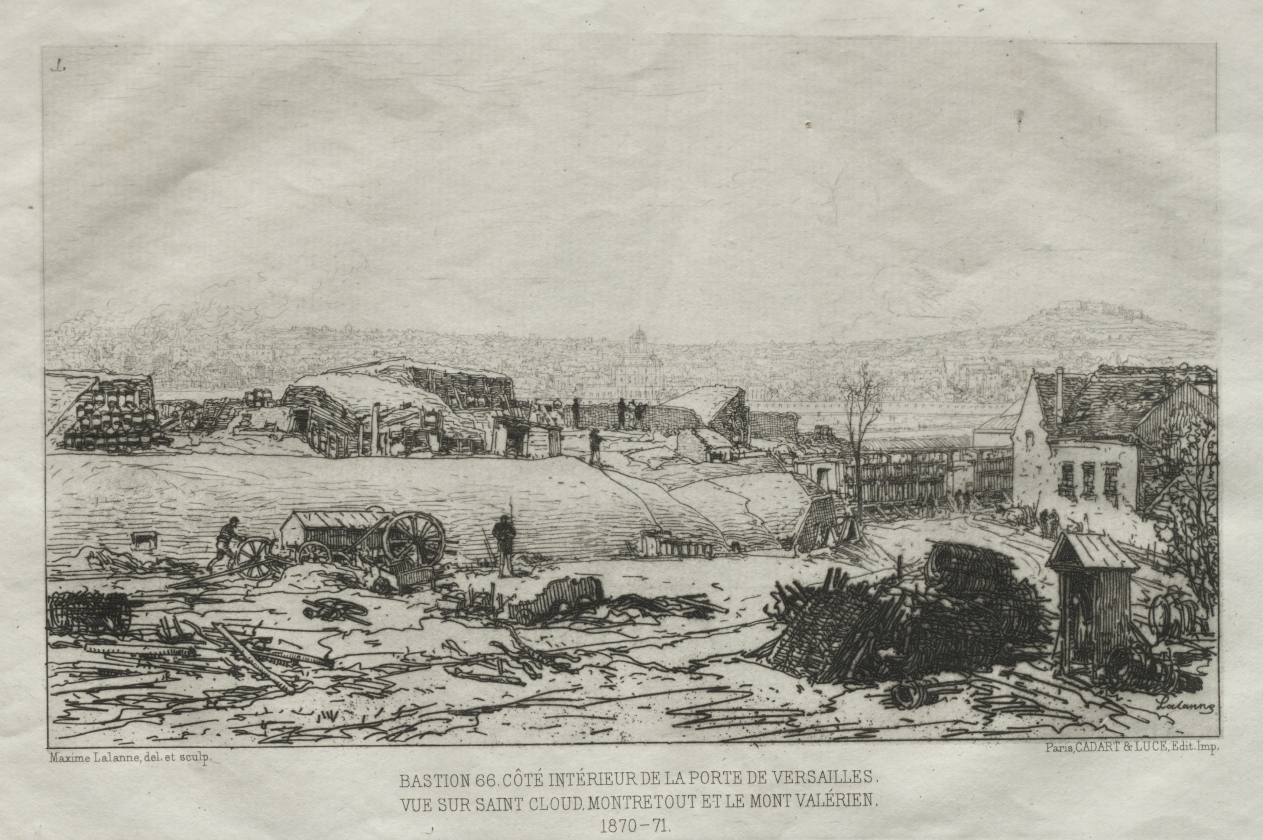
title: Bastion 66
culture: France, 19th century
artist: Maxime Lalanne (French, 1827–1886)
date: 1870–71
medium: etching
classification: Print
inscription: inscribed in plate: Lalanne (l.r.); printed in lower margin: Maxime Lalanne del et sculp. (l.l.); BASTION 66. CÔTE INTERIEUR DE LA PORTE DE VERSAILLES. / VUE SUR SAINT CLOUS, MONTRETOUT ET LE MONT VALÉRIEN /1870-71